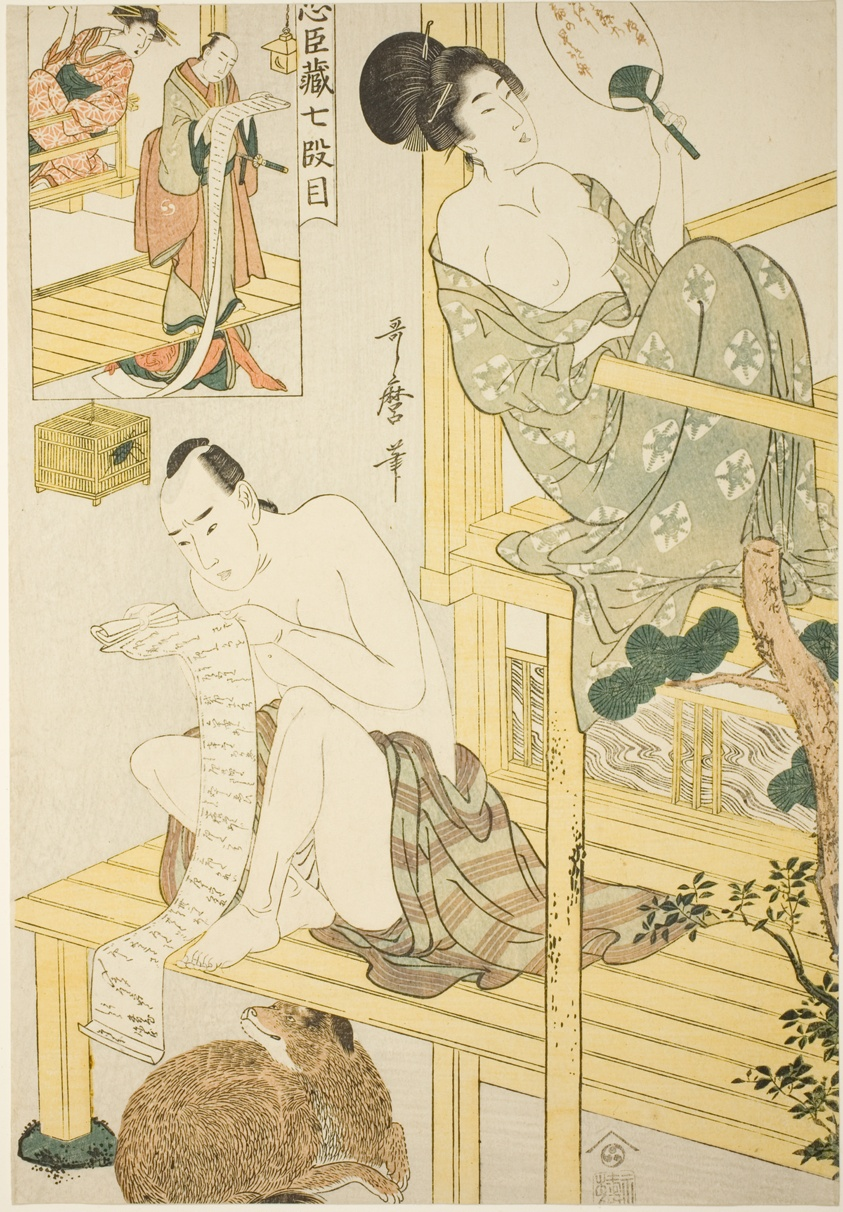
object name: Print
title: Act Seven, from the series "Treasury of the Loyal Retainers (Chushingura) (Shichi-damme)"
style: Japanese (culture or style)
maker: Kitagawa Utamaro 喜多川 歌麿; Japanese, 1753 (?)-1806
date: c. 1801/02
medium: Color woodblock print, oban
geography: Japan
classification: woodblock print; print; asian art